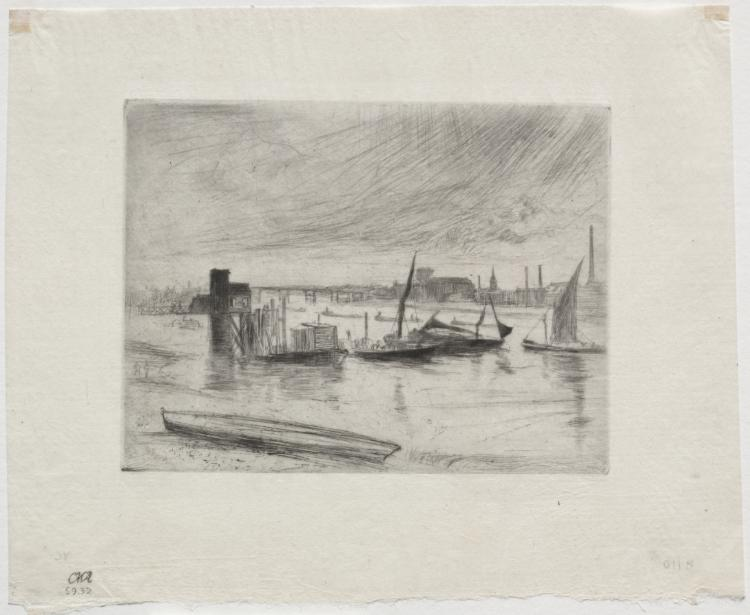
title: Early Morning, Battersea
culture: America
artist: James McNeill Whistler (American, 1834–1903)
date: 1863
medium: etching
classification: Print